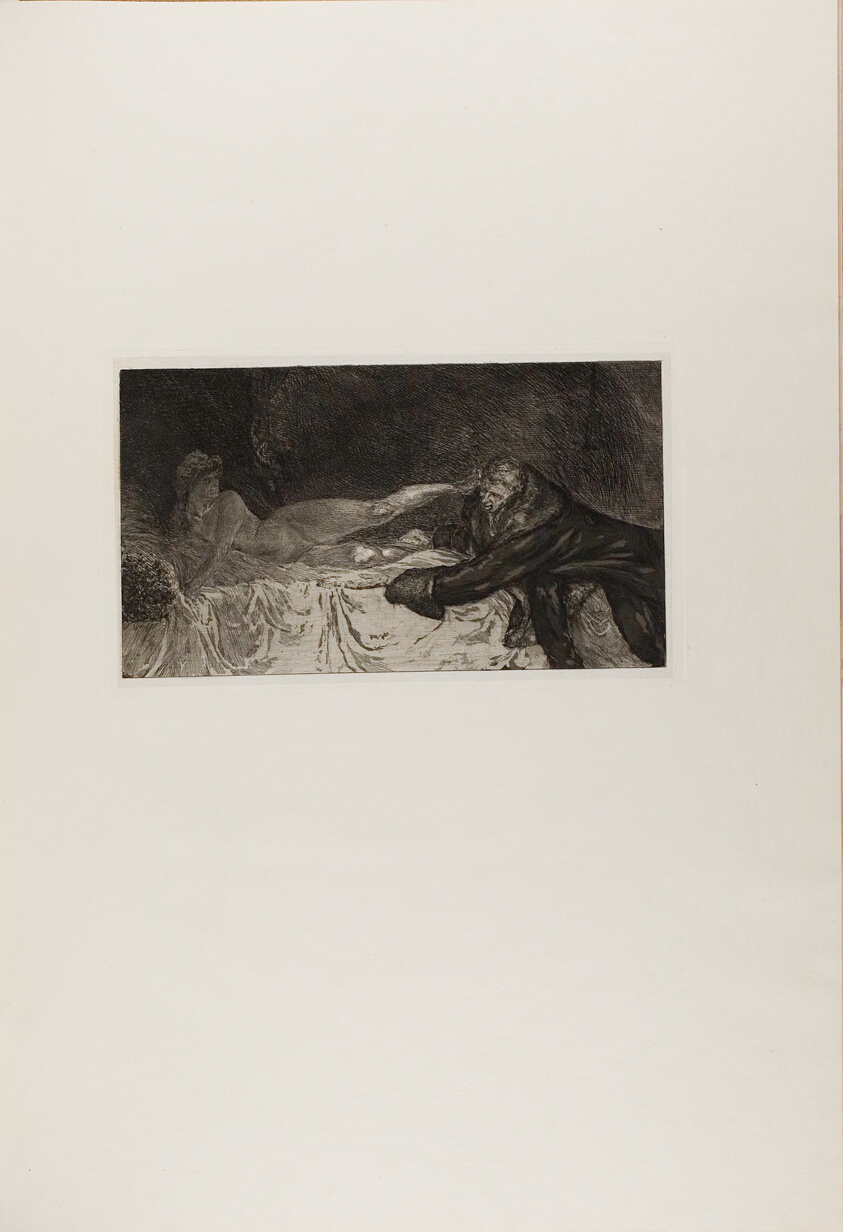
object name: Print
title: The Proposition, from A Life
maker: Max Klinger (German, 1857-1920); printed by Otto Felsing (German, 19th century)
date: 1884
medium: Etching and aquatint, with drypoint on ivory China paper, laid down on cream laid paper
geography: Germany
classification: etching; print; prints and drawing